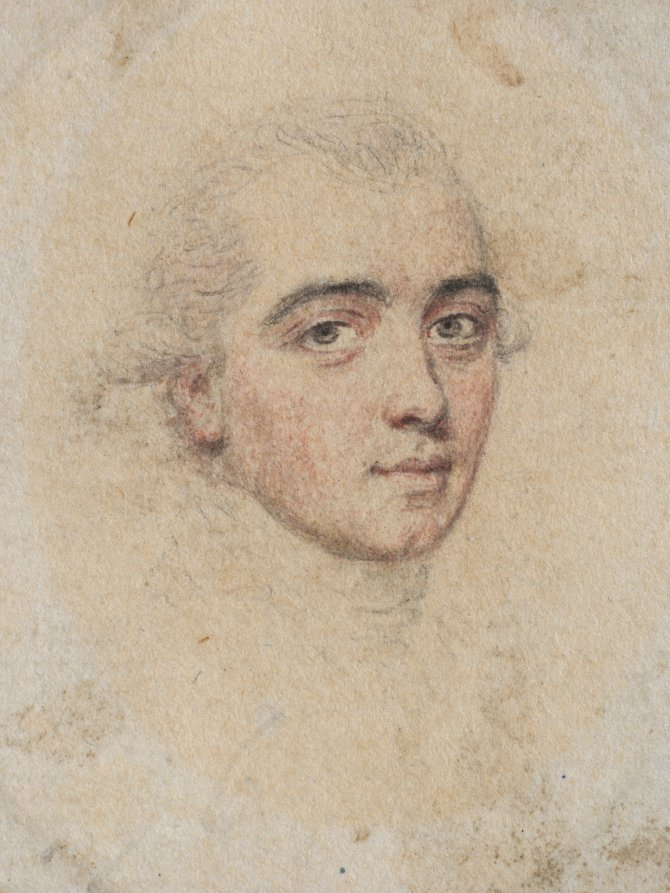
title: Portrait of M. de Viapre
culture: England, 18th century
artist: John I Smart (British, 1741–1811)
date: c. 1776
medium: graphite and wash on laid paper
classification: Portrait Miniature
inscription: Signature: none; inscribed on paper backing in graphite, upside down at upper left: 196; also on paper backing on slant at center, in graphite: Sir ?/John/Lester and 11; inscribed on back of drawing, under paper backing in graphite at bottom: Mr De [G?]iaf . . .; and in brown ink from top to bottom: Scarlet Coat . . . der Bottom [or possibly button]. . . green waistcoat . . . racelet & Spring [deli]vrd to Mr. Hall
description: Although it is impossible to say if it was always part of the artist’s process to execute a preparatory sketch prior to painting each miniature, we do know that John Smart retained many hundreds of these sketches. A group of preparatory sketches—of which this portrait is one—descended through the Smirke family after Smart’s daughter Sarah gave a sketchbook containing preparatory portrait studies to her friend Mary Smirke, sister of the celebrated Victorian architect Sydney Smirke. This book was probably broken up around 1877 when it was divided between Sydney’s daughters Mary Jemmett and Mrs. Lange, whose portions were both sold at auction in 1928. G. C. Williamson was the first to suggest that Smart’s sketches were well known and that they were preparatory studies for the painted miniatures. Williamson listed the names of sitters from the sketches known to him at the time, and they include Sir John Lester, the title formerly given to the sketch here. This designation was applied only to a paper backing that had been attached after the drawing had been removed from the sketchbook. There is no further evidence for this attribution, however. This sketch presents only the sitter’s head, with a slight suggestion of a high stock collar. His head faces to the left, and his light hair is combed straight back with a flat curl above the right ear. He has gray eyes, and the background is unpainted. The work can be dated to around 1776 because of its size, which, when painted on ivory, would have been around 2 inches high. An inscription on the back of the drawing was discovered when the paper backing was removed in 1993. It is a fragment of a larger inscription, from which it has been cut. It is partly illegible but suggests that the work was intended to be set in a bracelet, and it gives some information about how the sitter was to appear in the finished miniature, including the description “scarlet coat . . . green waistcoat.” This combination of colors might seem almost flashy, but it appears elsewhere in Smart’s work. These details seem to have been written in Smart’s hand, while the graphite inscription below—“Mr. De [?]”—was probably written later in another hand. Miniatures expert Arthur Jaffé remarked in 1948 that this portrait probably depicted John Lester of Poole, Dorset, who was knighted in 1802. However, this identity was based solely on the inscription on the later paper backing that Jaffé did not have the opportunity to see removed to reveal the inscription in Smart’s hand on the back of the drawing itself. There are no portraits of Sir John Lester known, and to this date, the finished ivory for which this preparatory sketch was presumably undertaken has not been discovered.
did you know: Sketches helped John Smart work out the particulars of a portrait before commencing the miniature on ivory; they were useful in the event that a duplicate might later be required.